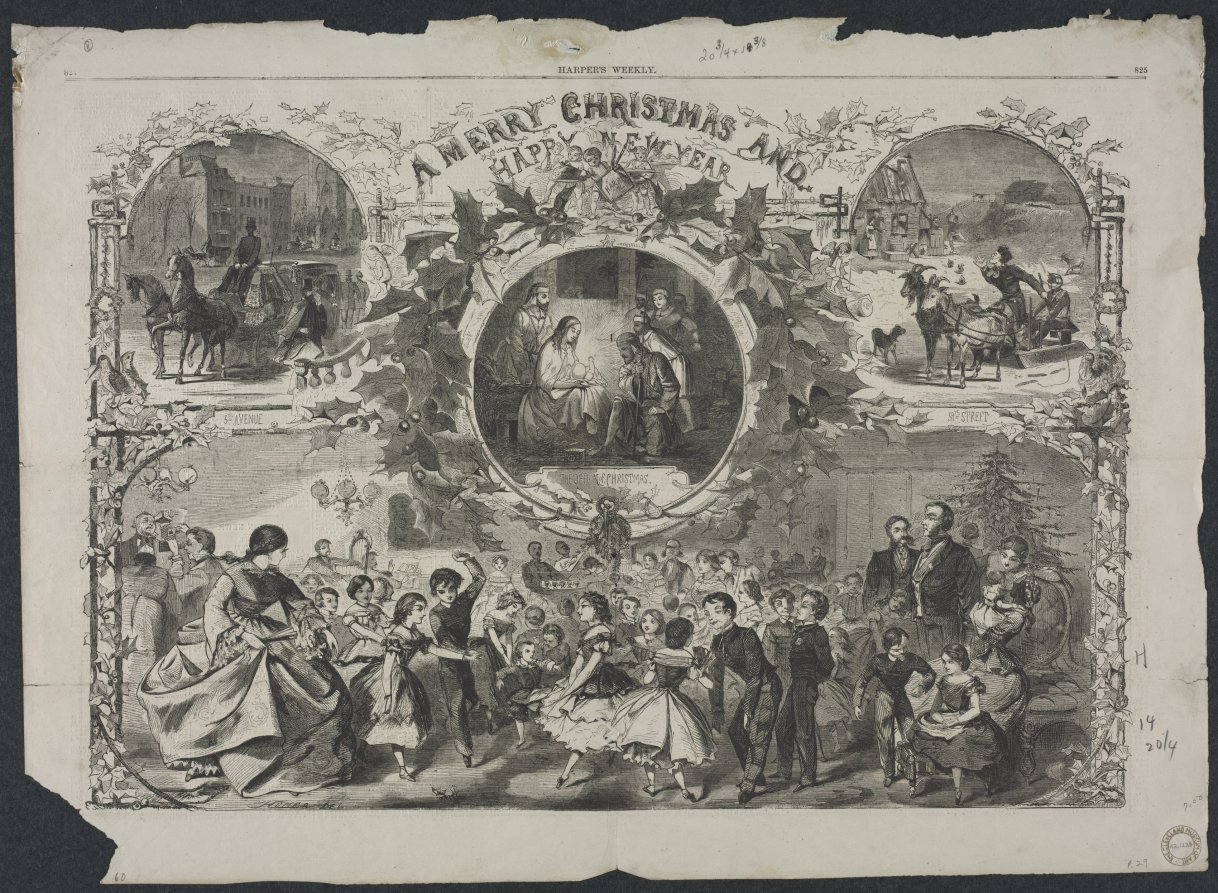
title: A Merry Christmas and a Happy New Year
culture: America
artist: Winslow Homer (American, 1836–1910)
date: 1859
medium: wood engraving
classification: Print